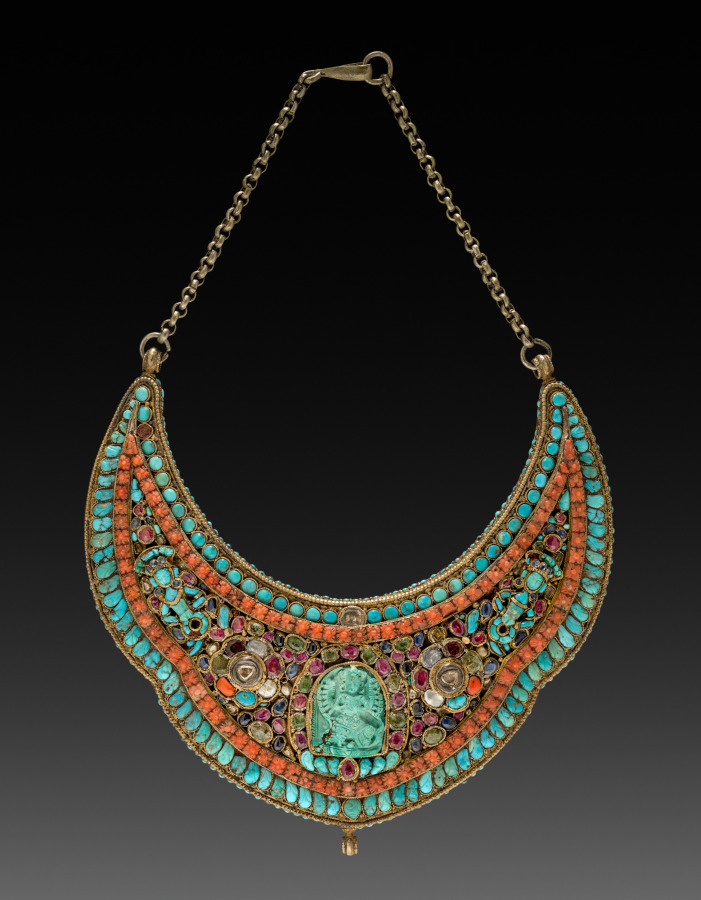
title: Gorget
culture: Tibet, 18th century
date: 1700s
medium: silver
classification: Jewelry